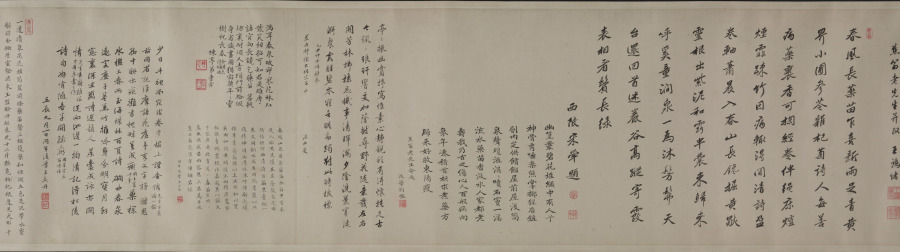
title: Cleansing Medicinal Herbs in the Stream on a Spring Day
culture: China, Qing dynasty (1644-1911)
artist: Yu Zhiding (Chinese, 1647–c. 1716)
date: 1703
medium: Handscroll; ink and color on silk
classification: Painting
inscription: Title by Chen Yixi.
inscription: 姑射仙人冰雪膚，新詩傳唱滿通都。/ 極知遲暮難為別，更展春泉洗藥圖。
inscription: Colophon by Chen Tingjing 陳廷敬 (1639–1712). Colophon by Wang Hongxu 王鴻緒 (1645–1723), dated 1707. Colophon by Song Luo 宋犖 (1634–1714). Colophon by Liu Yan 劉巗. Colophon by Jing Xikui 涇西夔. Colophon by Liu Yan 劉巗. Colophon by Cao Yin 曹寅. Colophon by Wang Shihong 汪士鋐. Colophon by Wang Shidan 王式丹 (1645–1718), dated 1712. Colophon by Shi Shenyi 史申義 (1661–1712), dated 1712. Colophon by Yin Yuqing 殷餘慶, dated 1712.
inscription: Colophon by Chen Shixia 陳時夏, dated 1729.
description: A famous portraitist, Yu Zhiding here depicts the likeness of Shi Shenyi 史申義 (1661–1712), an official and poet. Master Shi, a sickly man, was deeply interested in medicinal science. The opening section of the scroll features a boy washing a fungus in fresh spring water, a basket of medicinal herbs by his side. Other servants carry a fan, a bundle of scrolls, and a cup of tea or hot wine. Master Shi sits in a bamboo grove, surrounded by fields of herbs. Returning swallows, pink peach blossoms, and blooming magnolia indicate spring, whereas the fungus conveys wishes for long life. The spring theme may express the artist’s wish for his friend’s recovery.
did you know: In the pavilion are some of Shi Shenyi’s scholarly accoutrements: a stack of books, an antique zun 尊 (wine vessel), a brush holder, an ink stone, and a small chime.